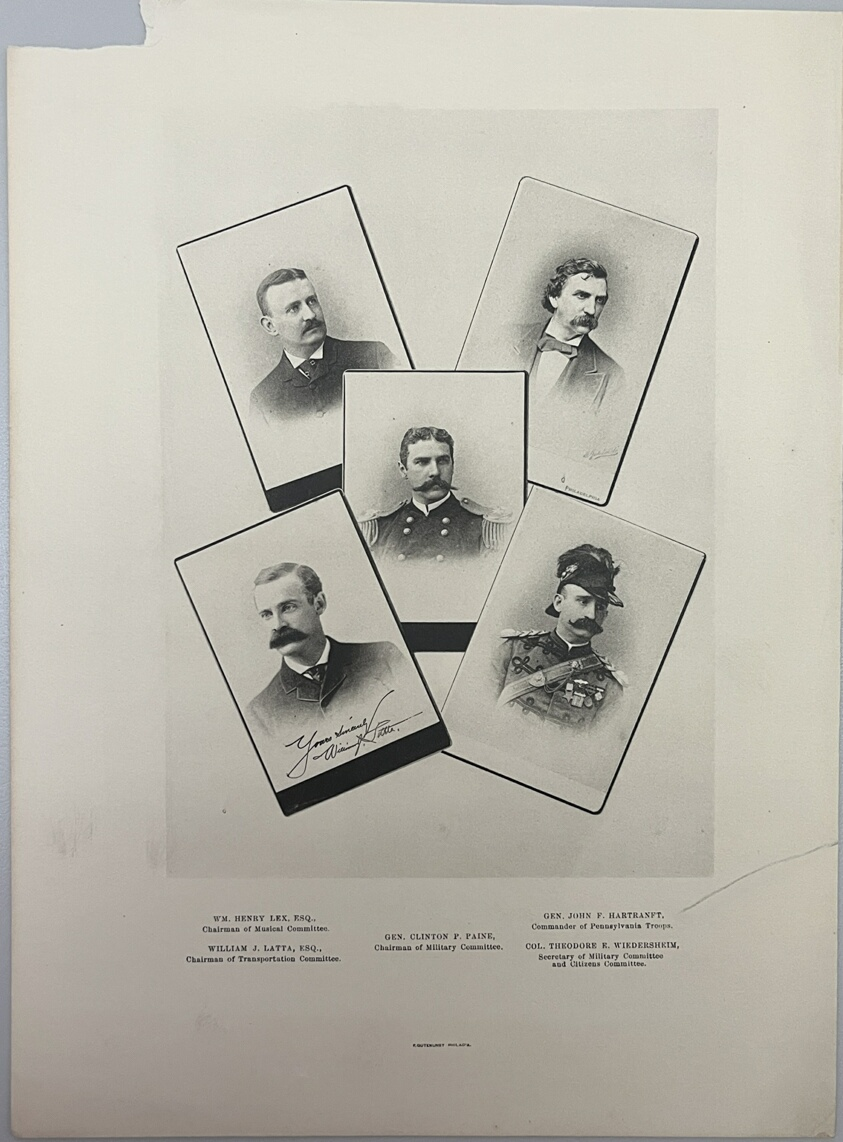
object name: Print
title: Portrait of Chairmen and Commanders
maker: Artist Unknown (Likely American or British, 19th century)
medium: Lithograph on paper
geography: United States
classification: reproduction; print; prints and drawing